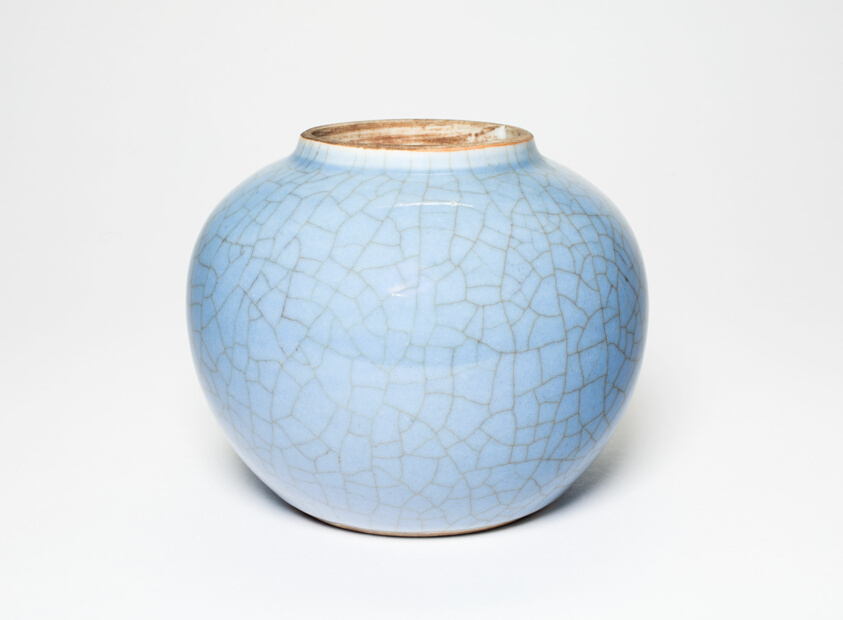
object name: Vessel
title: Globular Jar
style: Chinese (culture or style)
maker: China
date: Qing dynasty (1644–1911), Kangxi period (1662–1722)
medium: Porcelain with crackled robin's-egg blue glaze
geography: China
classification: vase; vessel; asian art; ceramics